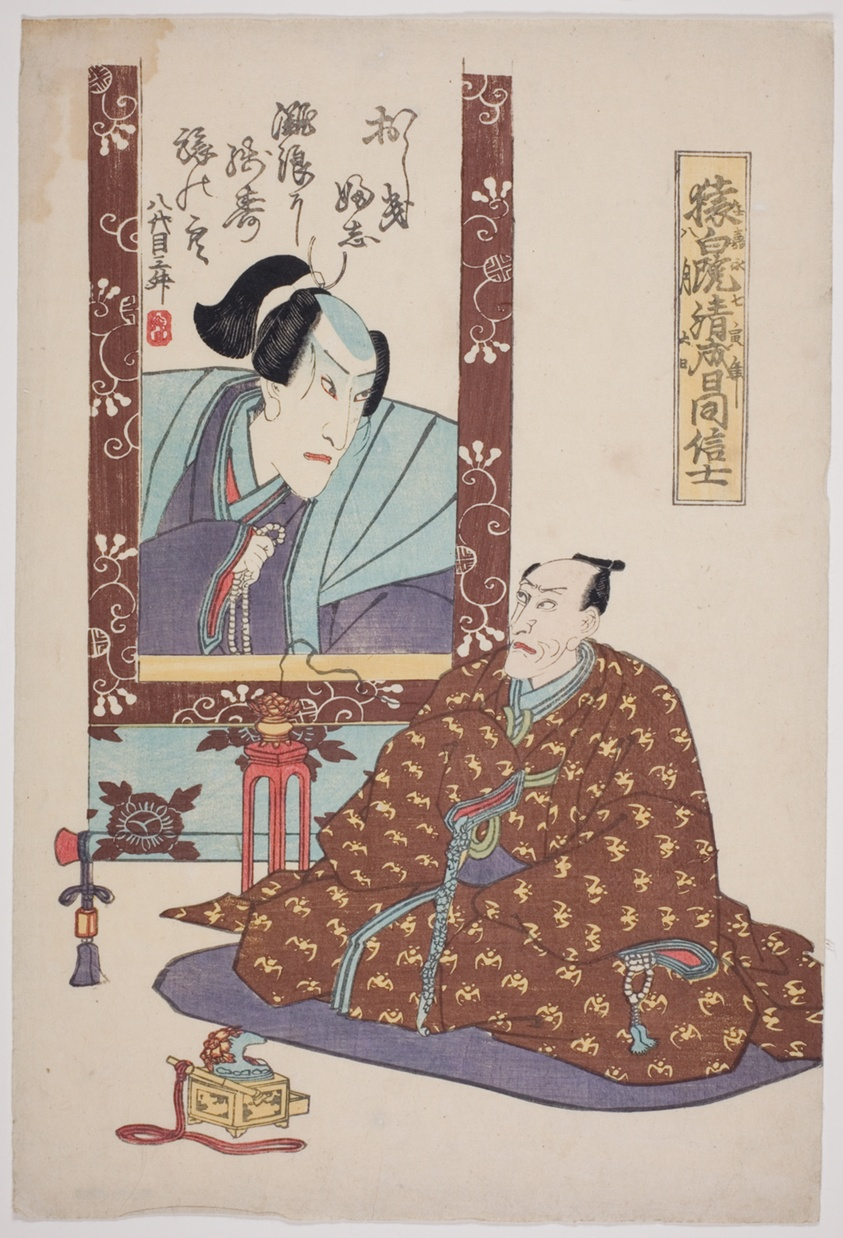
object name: Print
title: Memorial portrait: Ichikawa Ebizo V (Danjuro VII) looking up at a painting of the late Danjuro VIII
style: Japanese (culture or style)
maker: Attributed to Utagawa Kunisada I (Toyokuni III); Japanese, 1786–1864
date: 1854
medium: Color woodblock print; oban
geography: Japan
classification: print; asian art